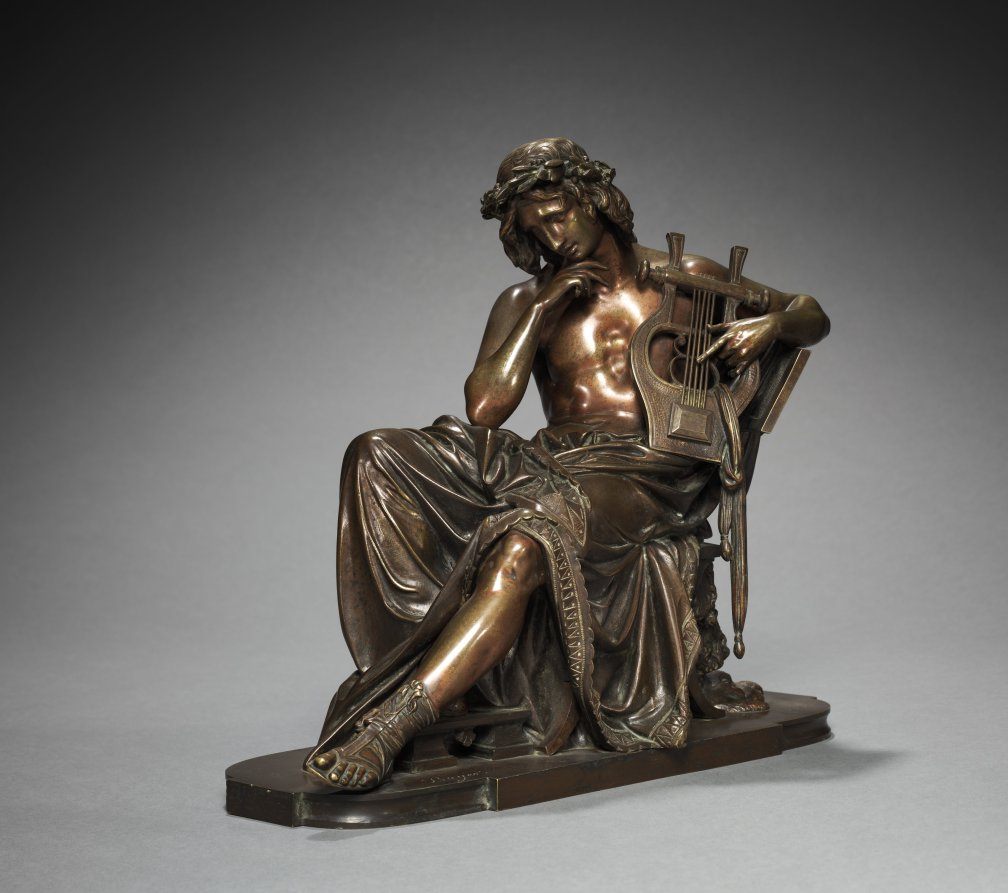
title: Orpheus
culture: France, 19th century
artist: Albert-Ernest Carrier-Belleuse (French, 1824–1887)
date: early 1860s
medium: bronze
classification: Sculpture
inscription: Signed: "A. Carrier"; inscribed: "Boyer"